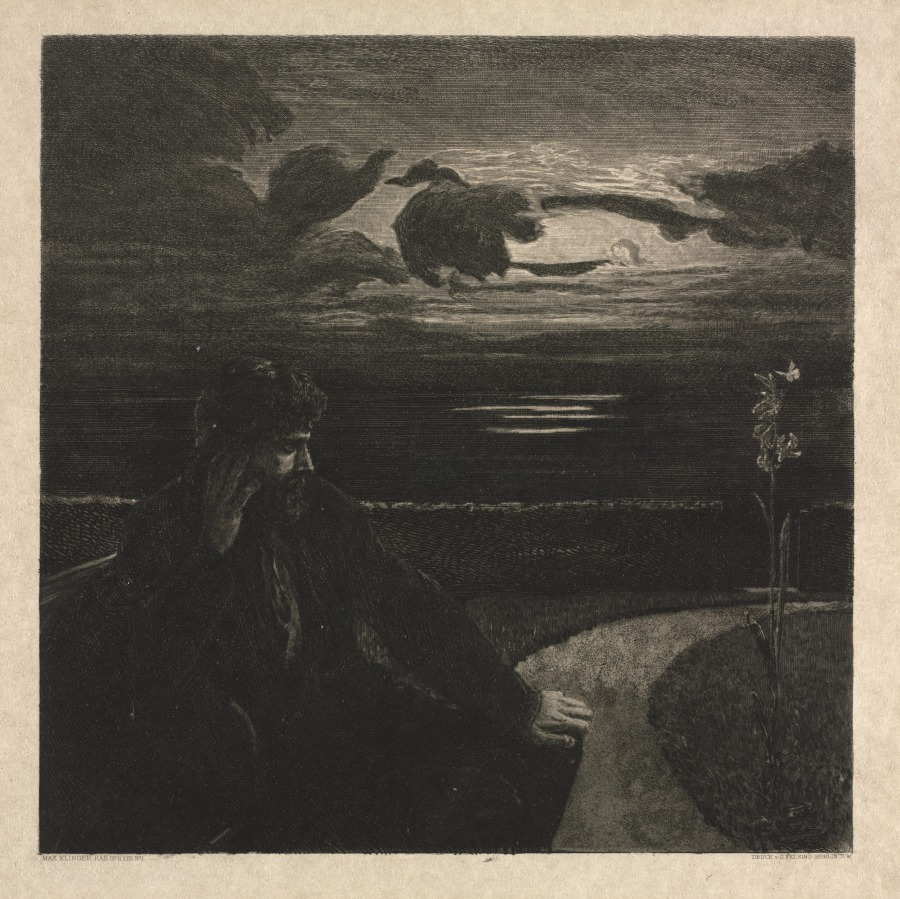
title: On Death, Part I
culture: Germany, late 19th century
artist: Max Klinger (German, 1857–1920)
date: 1889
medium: etching and aquatint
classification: Print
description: In On Death, Part One, a series of ten etchings, the Symbolist Max Klinger envisioned the ephemeral nature of life and the suddenness of death, themes that prompted one contemporary critic to call the portfolio a modern "Dance of Death." In Night, the first in the series, a man sits on a bench in an enclosed garden. A moonbeam breaks through the clouds over the sea, and on the path to the right is a lily with a fluttering butterfly. The landscape seems an extension of the figure’s melancholy thoughts, a landscape of the mind.